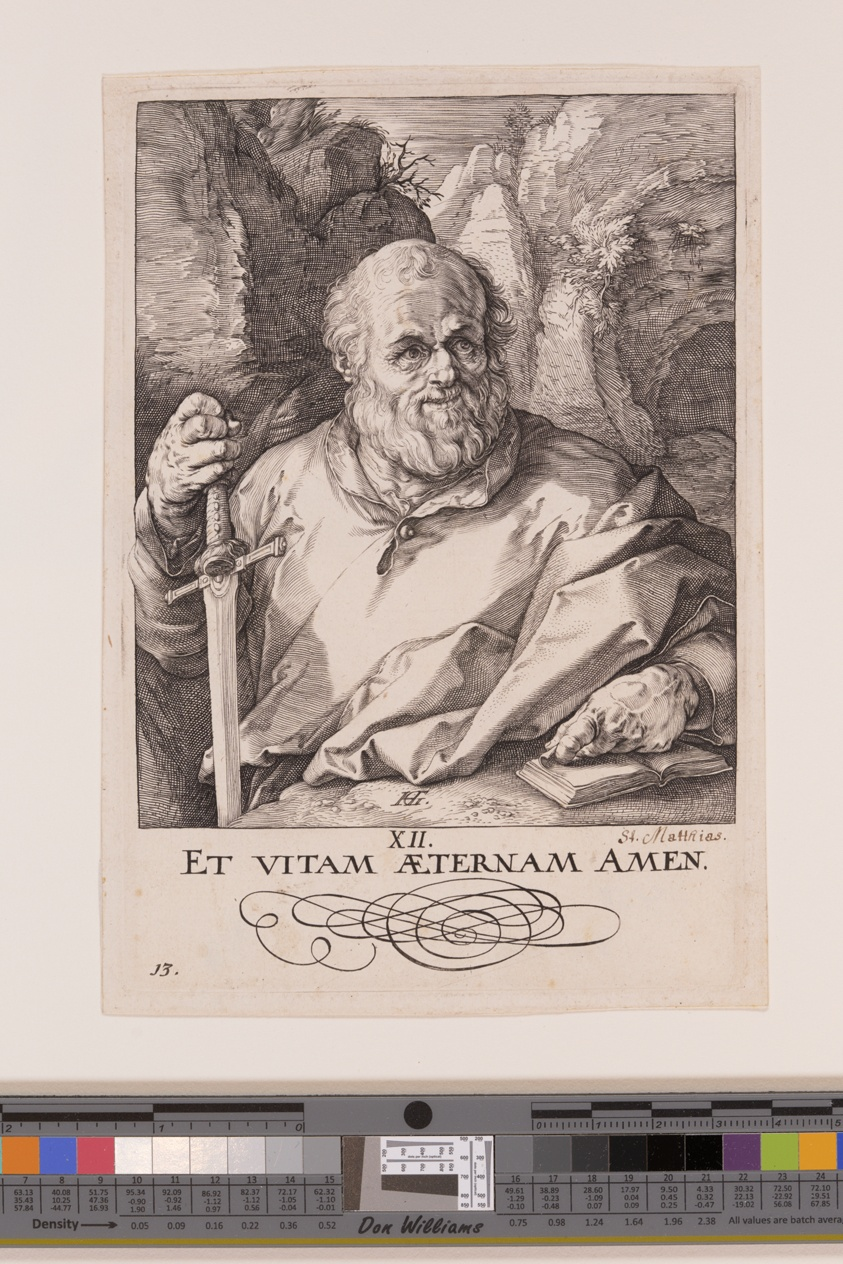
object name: Print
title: St Matthias, from Christ, the Apostles and St Paul with the Creed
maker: Hendrick Goltzius (Dutch, 1558–1617)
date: 1589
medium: Engraving on ivory laid paper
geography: Netherlands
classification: engraving; paper; print; prints and drawing